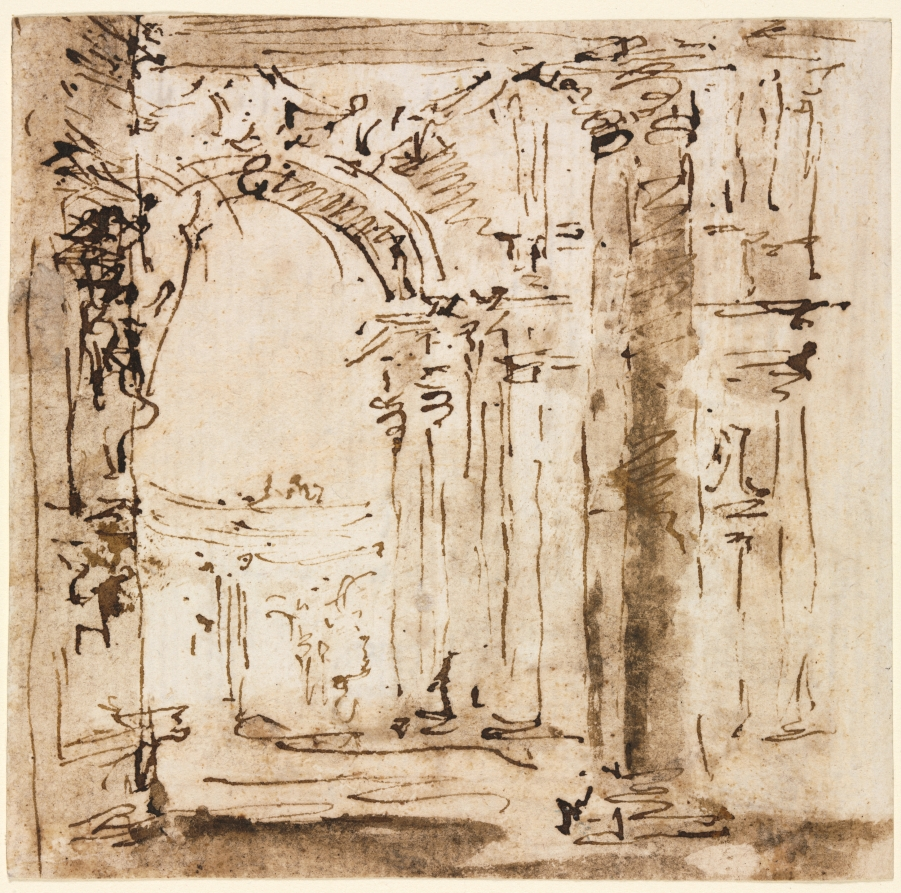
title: Sketch of the Labyrinth of the Villa Pisani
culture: Italy, 18th century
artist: Francesco Guardi (Italian, 1712–1793)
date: 1773–1778(?)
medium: pen and brown ink with brush and brown wash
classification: Drawing